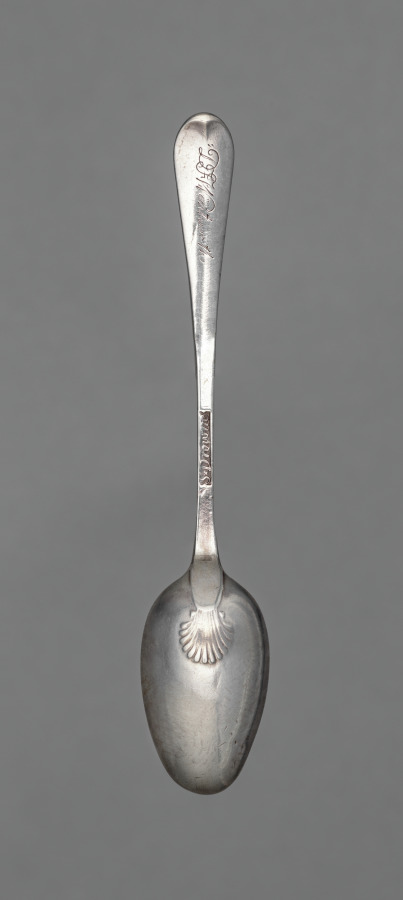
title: Teaspoon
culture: America, New Hampshire, Portsmouth, 18th century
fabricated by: Samuel II Drowne (American, 1749–1815)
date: c. 1770–1780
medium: silver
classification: Silver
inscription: engraved "M+F" in block letters on top of handle end, and "D.F.Wentworth" (later) in script on back of handle end.